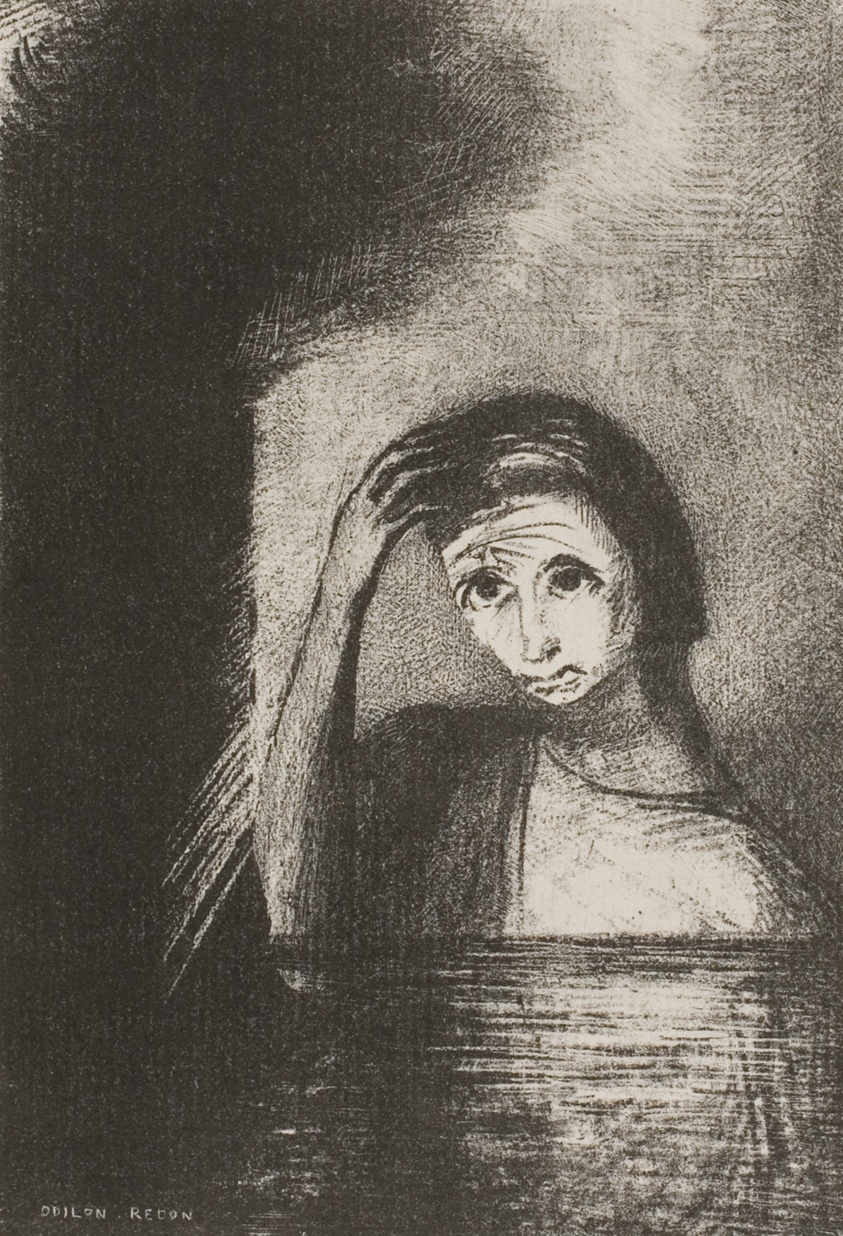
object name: Print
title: Frontispiece from Emile Verhaeren's Les Debacles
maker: Odilon Redon (French, 1840-1916)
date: 1889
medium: Lithograph in black on ivory laid paper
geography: France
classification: lithograph; print; prints and drawing; paper